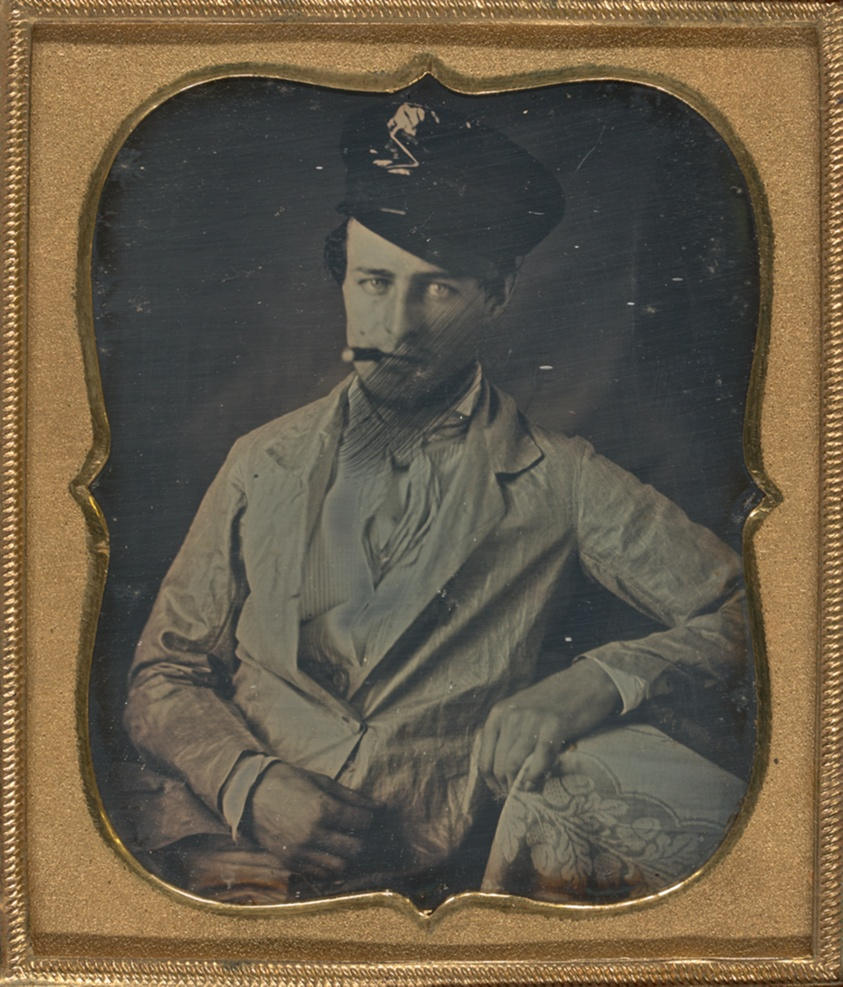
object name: Photograph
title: Untitled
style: 19th century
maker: Artist unknown; 19th century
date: 1839/99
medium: Daguerreotype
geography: Unknown Place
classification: daguerreotype; photographic process; photography; photograph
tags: portraits, portraits: male subject, photography, formal portraits